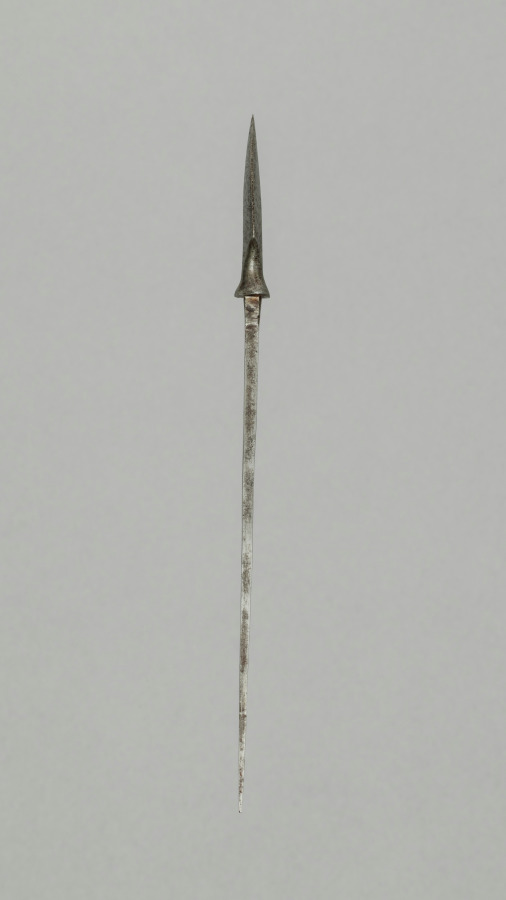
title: Arrow Point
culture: Japan, Edo period (1615–1868)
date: 1700s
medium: steel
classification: Arms and Armor